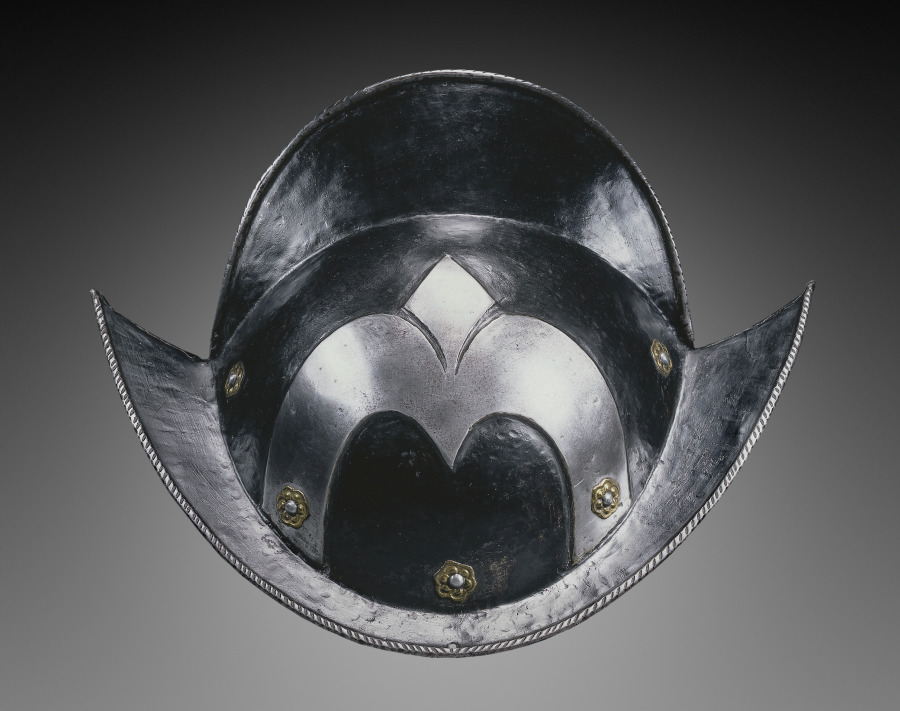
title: Black and White Morion (of Munich Town Guard)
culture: Germany, late 16th Century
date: c. 1575–1600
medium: steel, roped edge, decorative brass rivet washers as rosettes; black paint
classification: Arms and Armor